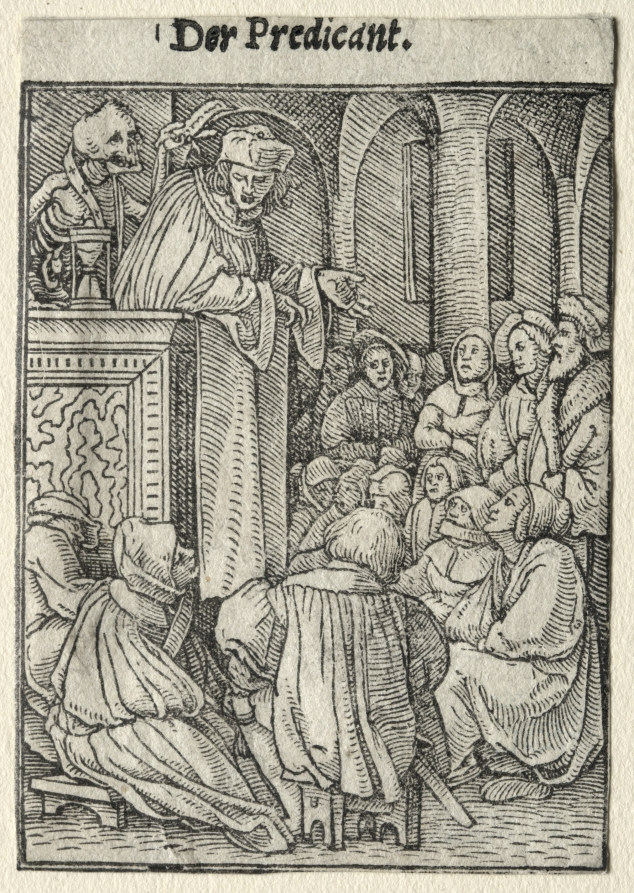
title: Dance of Death: The Preacher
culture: Germany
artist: Hans Holbein the Younger (German, active England and Switzerland, 1497/98–1543)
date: c. 1526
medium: woodcut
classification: Print